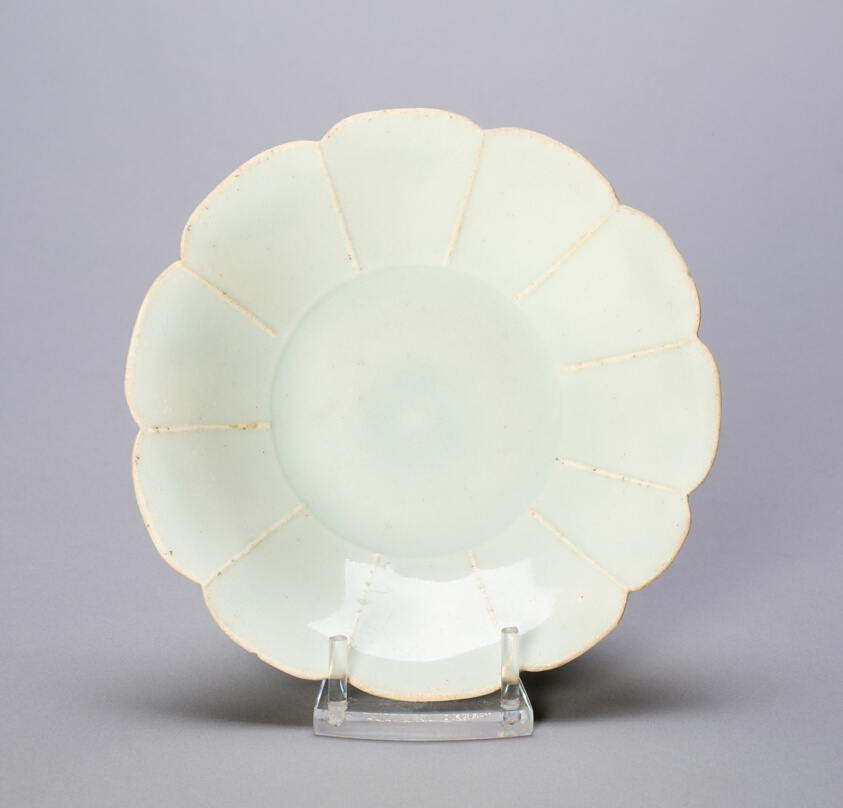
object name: Vessel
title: Petal-Lobed Dish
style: Chinese (culture or style)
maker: China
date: Northern Song dynasty (960–1127)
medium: Qingbai ware; glazed porcelain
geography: China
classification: dish (vessel); ceramics; vessel